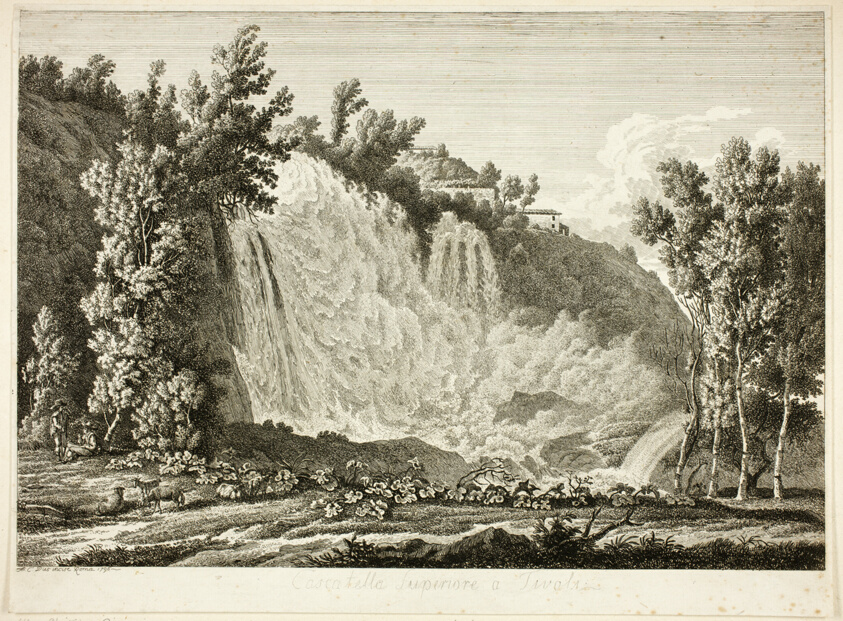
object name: Print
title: Waterfall Above Tivoli (Cascatella Superiore a Tivoli), from the series Picturesque Views of Italy (Malerisch radirte Prospekte aus Italien)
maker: Albert Christoph Dies (Austrian, born Germany, 1755-1822)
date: 1796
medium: Etching on cream laid paper, tipped along top margin to cream laid paper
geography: Austria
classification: etching; print; prints and drawing